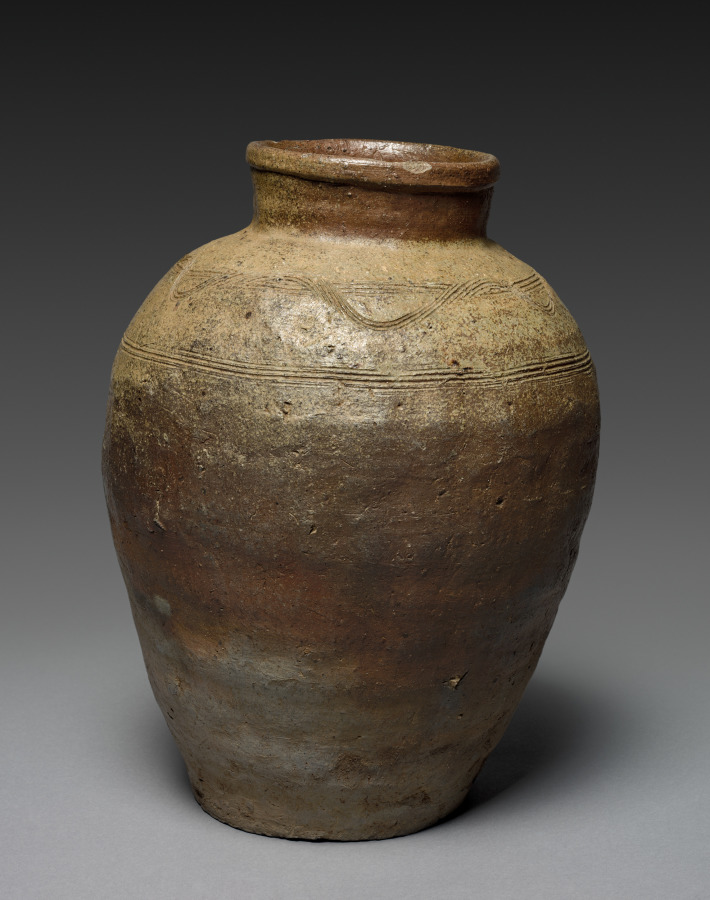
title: Jar with Incised Combed Shoulder Designs: Bizen Ware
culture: Japan, Muromachi period (1392–1573)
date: 1400s–1500s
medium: stoneware, ash glaze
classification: Ceramic